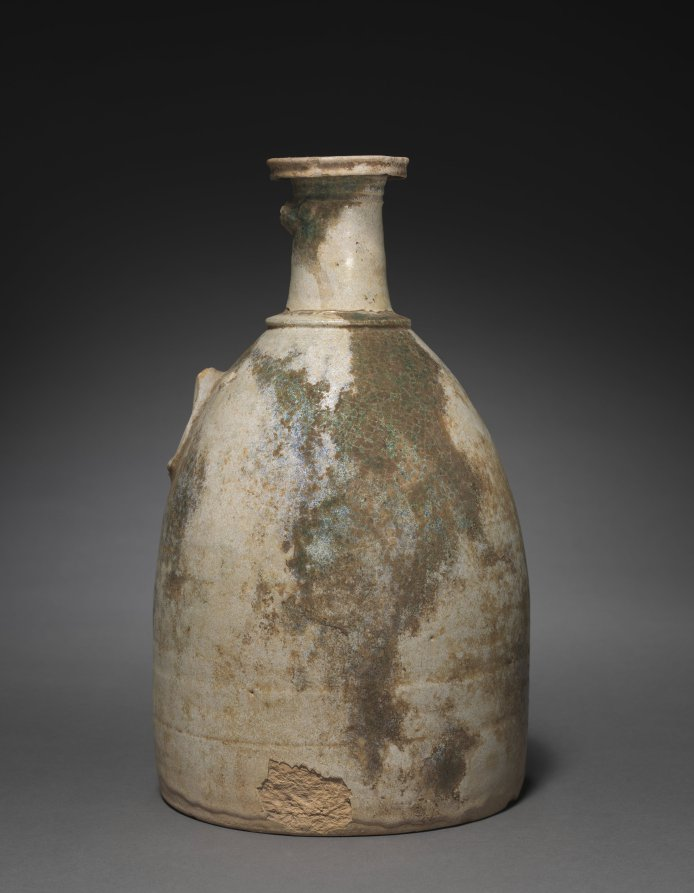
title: Jar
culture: Parthian Empire (247 BCE–224 CE)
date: 1–200 CE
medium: terracotta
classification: Ceramic